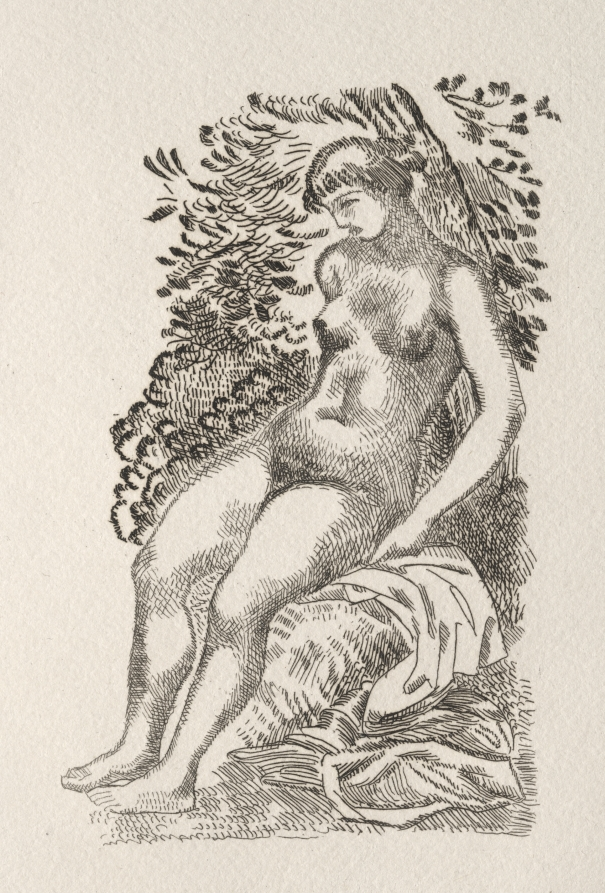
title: Illustration for a Poem by Pierre de Ronsard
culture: France, 20th century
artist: Aristide Maillol (French, 1861–1944)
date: 1938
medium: etching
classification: Print